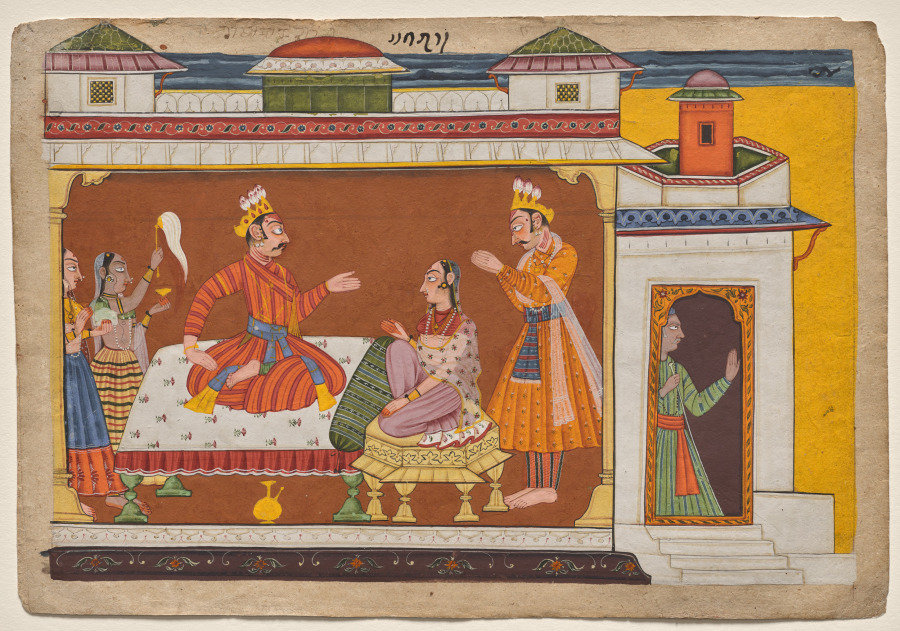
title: King Dasharatha confers with Kaikeyi, from the “Shangri” Ramayana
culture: Northern India, Pahari kingdoms, Himachal Pradesh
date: c. 1700–1725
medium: Gum tempera and ink on paper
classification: Painting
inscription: [[recto]] 16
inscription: [[recto]] (indistinct Takri note unrelated to the picture)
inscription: [[verso, in Sanskrit with Devanagari numerals]] 16 ayodhyā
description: Two years after the weddings of his four sons, King Dasharatha is ready to retire and name Rama as his successor. To simplify matters in the palace, he feels that he should send two of Rama’s brothers on a trip to visit their maternal grandfather, so that they will be away when he makes the announcement. In the top margin is the number 18 in the Takri script of the northwest Himalayas. It was not intended to remain visible because the opaque mercury-red or arsenic-yellow paint would have covered it. These toxic pigments, used to prevent insects or animals from eating the paper, were never applied to the border, indicating its unfinished state.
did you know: Dasharatha’s chief wife Kaushalya, mother of Rama, kneels on the golden stool.